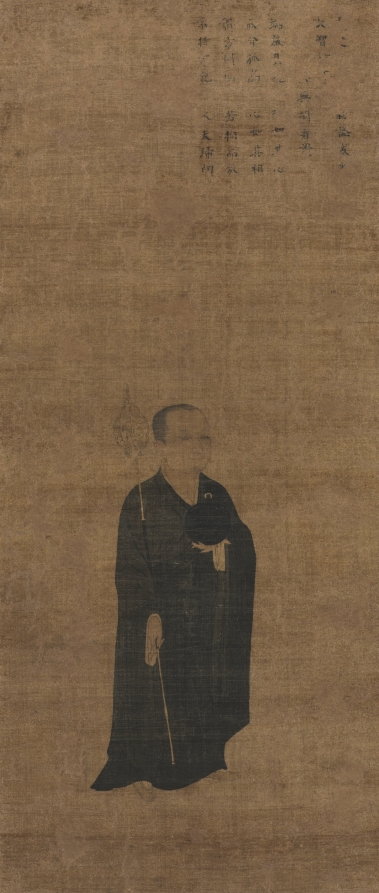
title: Portrait of Priest Dazhi (1048–1116), Master of Law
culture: China, Southern Song dynasty (1127-1279)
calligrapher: Liu Tao (Chinese, late 1000s–early 1100s)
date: 1100s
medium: Hanging scroll; ink and light color on silk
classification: Painting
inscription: Inscription by Liu Tao (late 1000s–early 1100s): Dignified with the perfection of the upasampada,/ His appearance is like his mind;/ Uncompromising and loftily aloof,/ His mind is like his appearance./ To say he is square, he proves to be round;/ He looks timid, yet his spirit is unbound./ Having no attachment, and holding no reins,/ Man and deities alike take refuge in him. (Translation by WKH, 1980)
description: Monk Yuanzhao, with the honorific title Dazhi Lüshi, Great Wisdom Master of Vinaya, is depicted here as an itinerant monk, holding his alms bowl in the left and staff in the right. In 1142, Emperor Gaozong had bestowed Yuanzhao with a posthumous title, mentioned in the inscription, which suggests that the portrait was made after the master’s death. A master of the Lü sect of Buddhism, with a calm benevolent smile on his face, Yuanzhao was active on Mount Tiantai and in Hangzhou. Later, Liu Tao, a southerner from Changxing, added the inscription. The eulogy reads: Dignified he is, perfect in his upasampada [ordination of a monk]. His appearance is like his mind. Uncompromising and aloof. His mind is like his appearance. To say he is square, he proves to be round. He looks timid, yet his spirit is unbound. Having no attachment, and holding no reins, men and deities alike take refuge in him. —translated by Wai-Kam Ho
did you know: A native of Hangzhou, the priest Dazhi was known for his eloquent exposition of Buddhist doctrines and for his success in winning many converts.